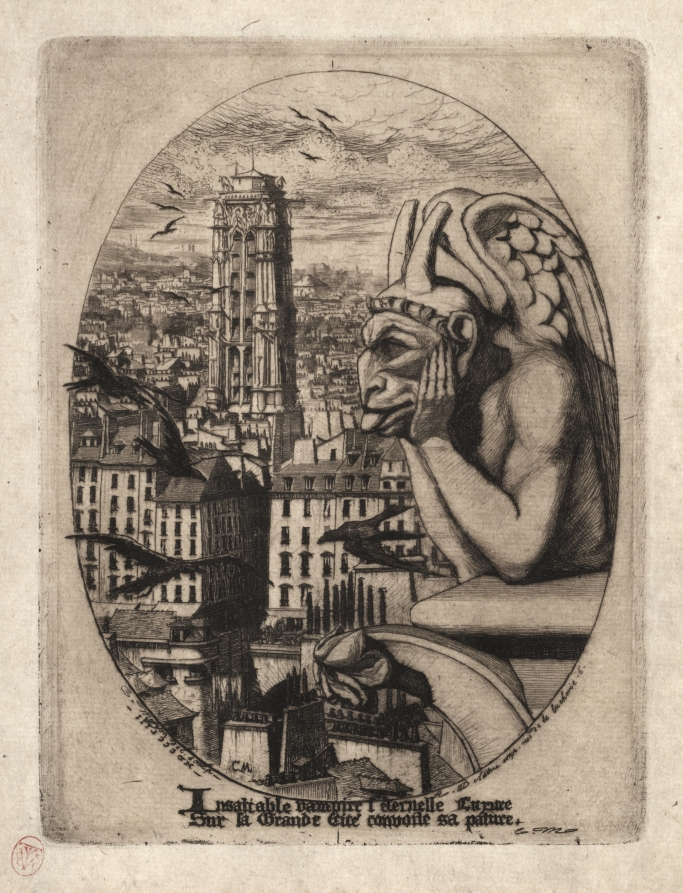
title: Etchings of Paris: The Gargoyle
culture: France, 19th century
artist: Charles Meryon (French, 1821–1868)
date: 1853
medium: etching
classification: Print